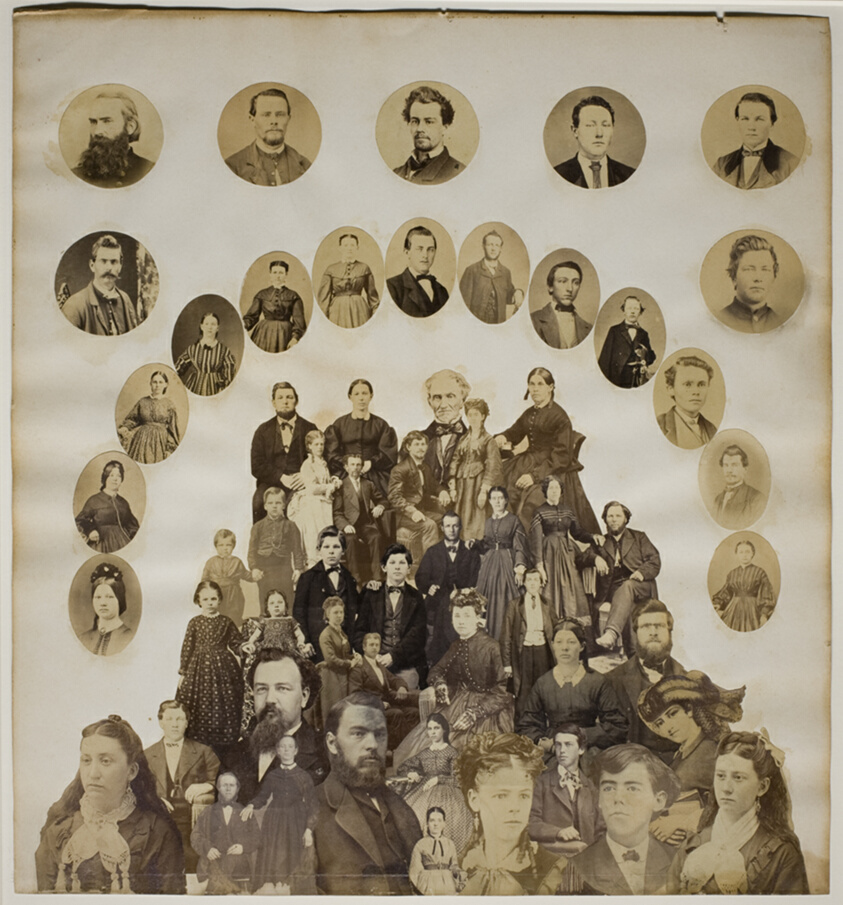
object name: Photograph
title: Civil War Collage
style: 19th century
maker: Maker unknown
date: c. 1860/70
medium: Photocollage (albumen prints)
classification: photograph; photography